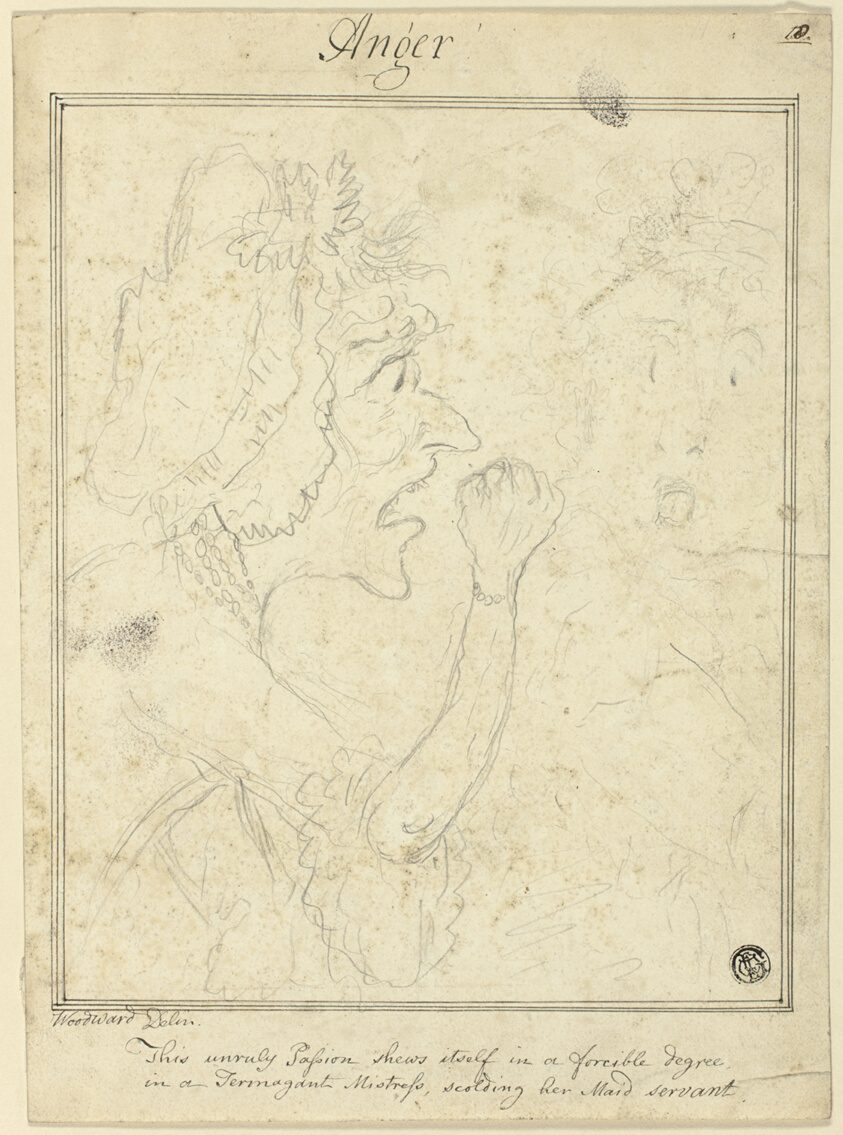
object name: Drawing and Watercolor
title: Anger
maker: George Woodward (English, c. 1760-1809)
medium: Graphite, with pen and brown ink (recto), and traces of graphite (verso), on ivory wove paper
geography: England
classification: graphite; drawings (visual works); prints and drawing